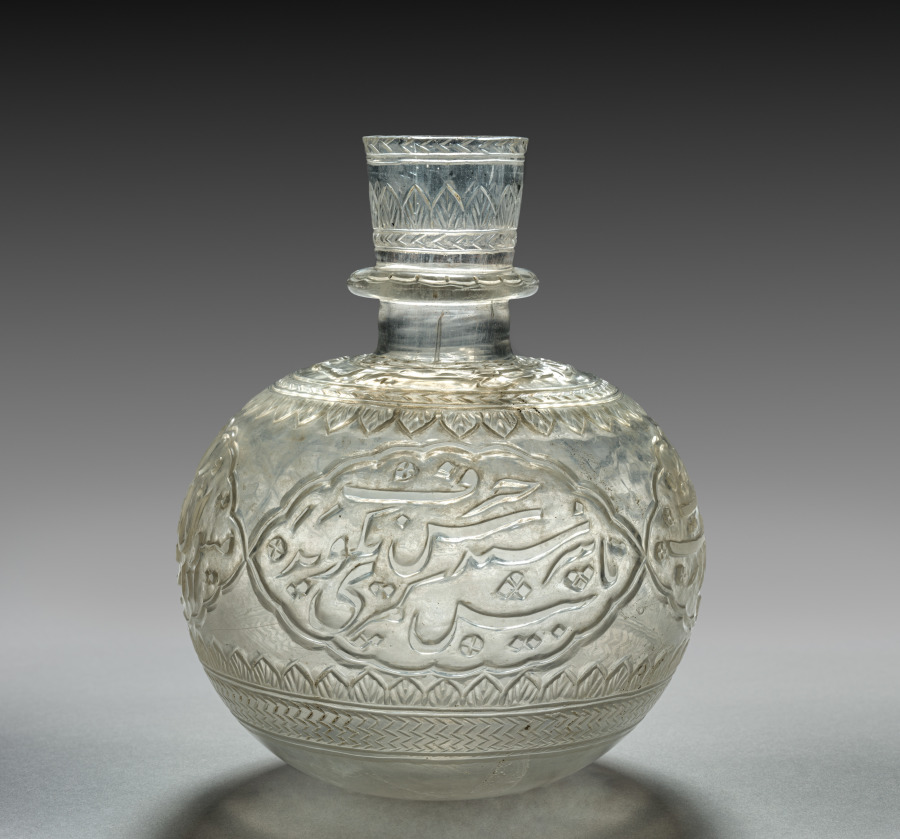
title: Hookah Bowl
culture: India, Mughal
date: 1700s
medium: glass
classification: Glass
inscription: Inscription in Farsi, on body: Even if live charcoal is placed on its head/ The hookah, a teacher of etiquette,/ will not respond unless drawn upon;/ Thus one can learn from its manners of refinement.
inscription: Inscription in Farsi, on shoulder: In the name of Allah the clement and merciful is the key to the wise treasure.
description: The inscription around the body of the base speaks to the use of the hookah in the decadent life of the Mughal court. The hookah is commended for being a proper, refined servant who will not “respond unless drawn upon” or, produce water bubbles when smoke is drawn through the hose. Undoubtedly the witty, poetic allusions would have been appreciated at banquets and other courtly gatherings. The use of wheel-cut glass for this hookah base may have been influenced by English glass and lead crystal that was exported to India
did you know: Around the top of this hookah bowl are incised the opening two lines from the Khamsa (Quintet) of the celebrated Persian poet Nizami (1141–1209).